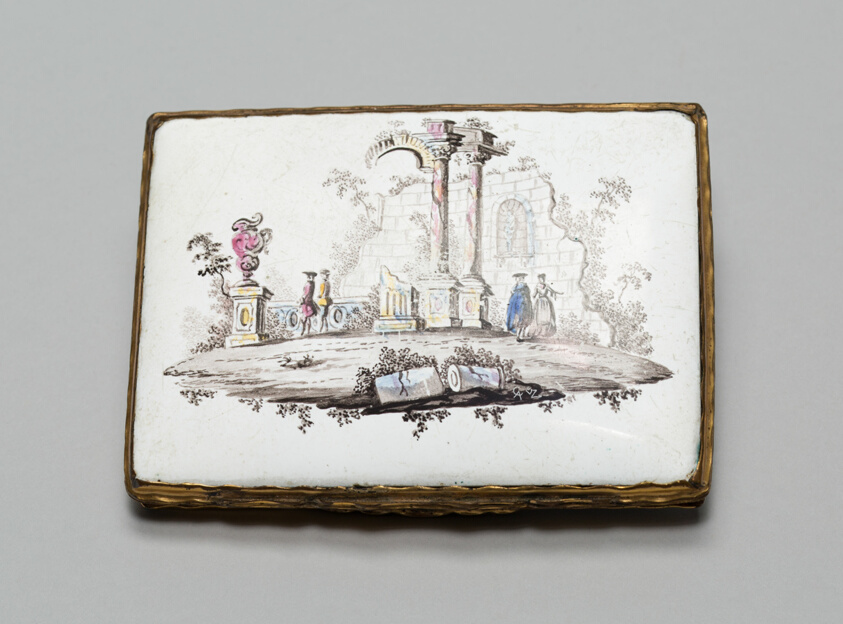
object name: Metalwork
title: Box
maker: Höchst Factory; German, founded 1746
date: c. 1760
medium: Enamel on metal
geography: Höchst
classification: porcelain; ceramics; european decorative arts; metalwork